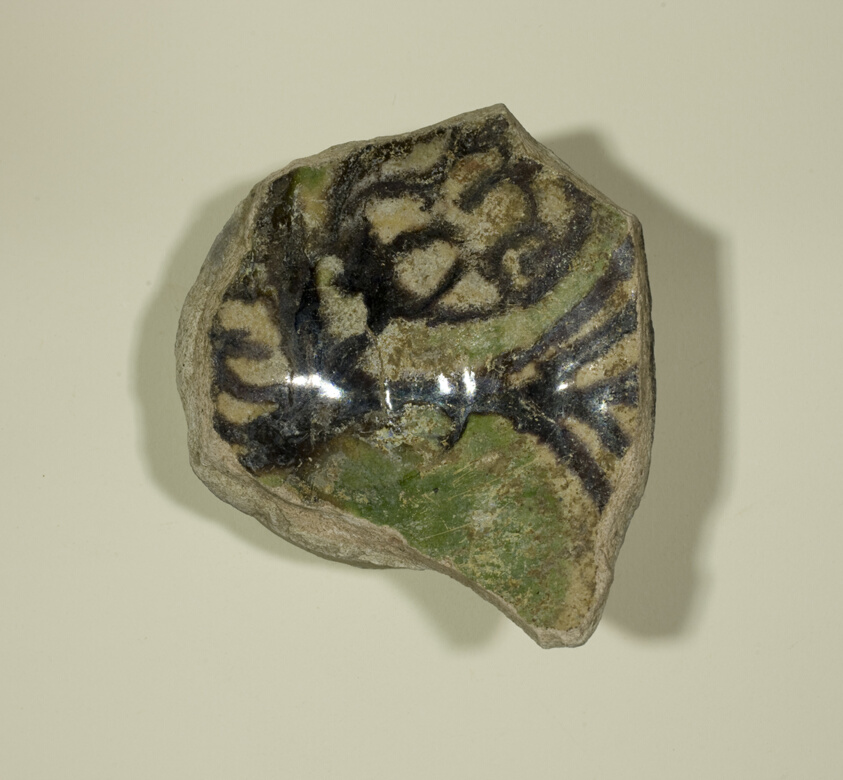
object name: Decorative Arts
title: Fragment of a Bowl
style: byzantine, european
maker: Byzantine (Greece, Serres or Cyprus)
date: 13th-14th century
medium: Ceramic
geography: Istanbul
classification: fragment; ceramics; vessel; bowl; asian art; decorative arts